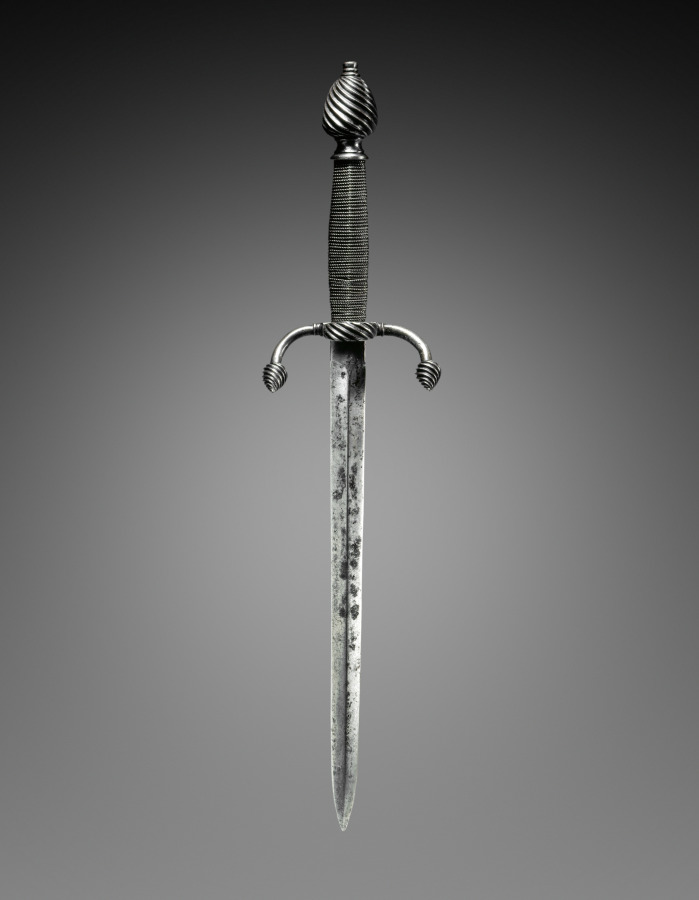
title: Parrying Dagger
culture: Germany, early 17th Century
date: c. 1600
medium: steel, wire grip with arched quillions and side ring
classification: Arms and Armor